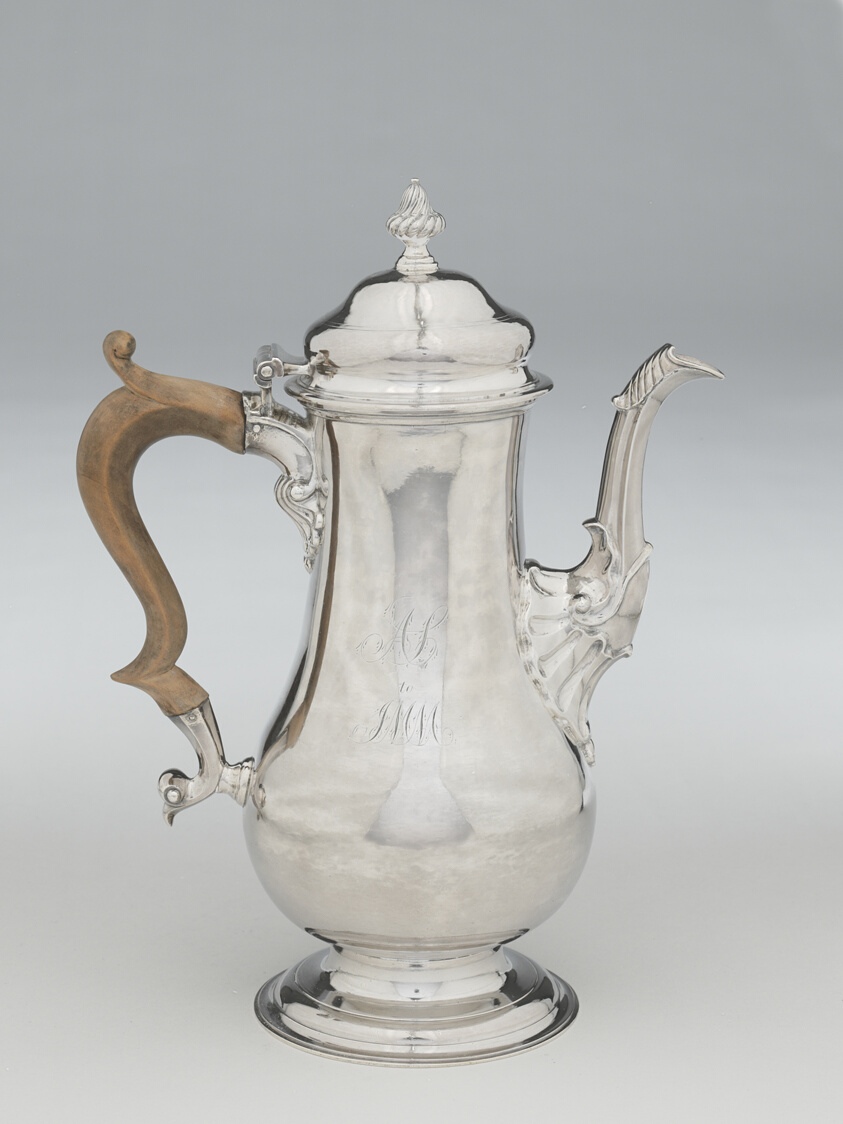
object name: Metalwork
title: Coffeepot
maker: Joseph Richardson, Sr.; American, 1711–1784; Philadelphia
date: c. 1770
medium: Silver with mahogany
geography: Philadelphia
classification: coffeepot; silver; american decorative arts; american arts; decorative arts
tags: dining, drinking